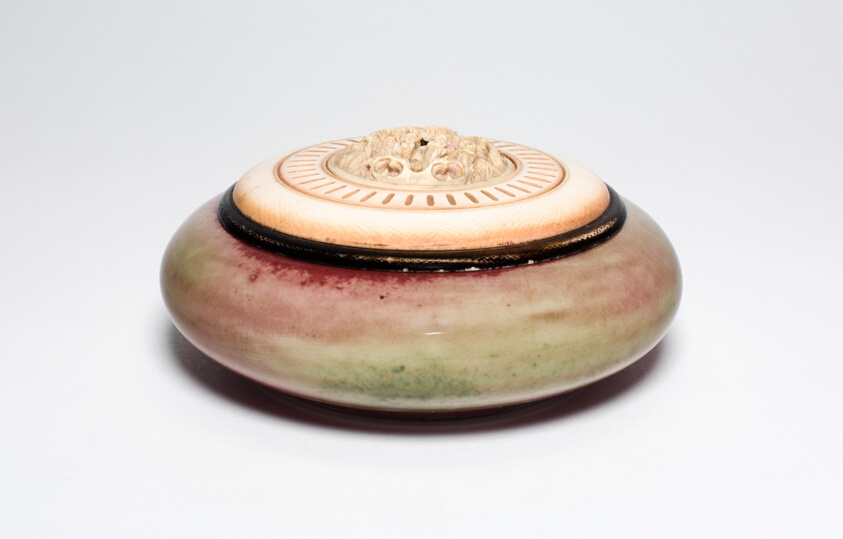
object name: Vessel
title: Brush Washer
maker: China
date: Qing dynasty (1644–1911), Kangxi reign mark and period (1662–1722)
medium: Porcelain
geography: China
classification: porcelain; asian art; ceramics